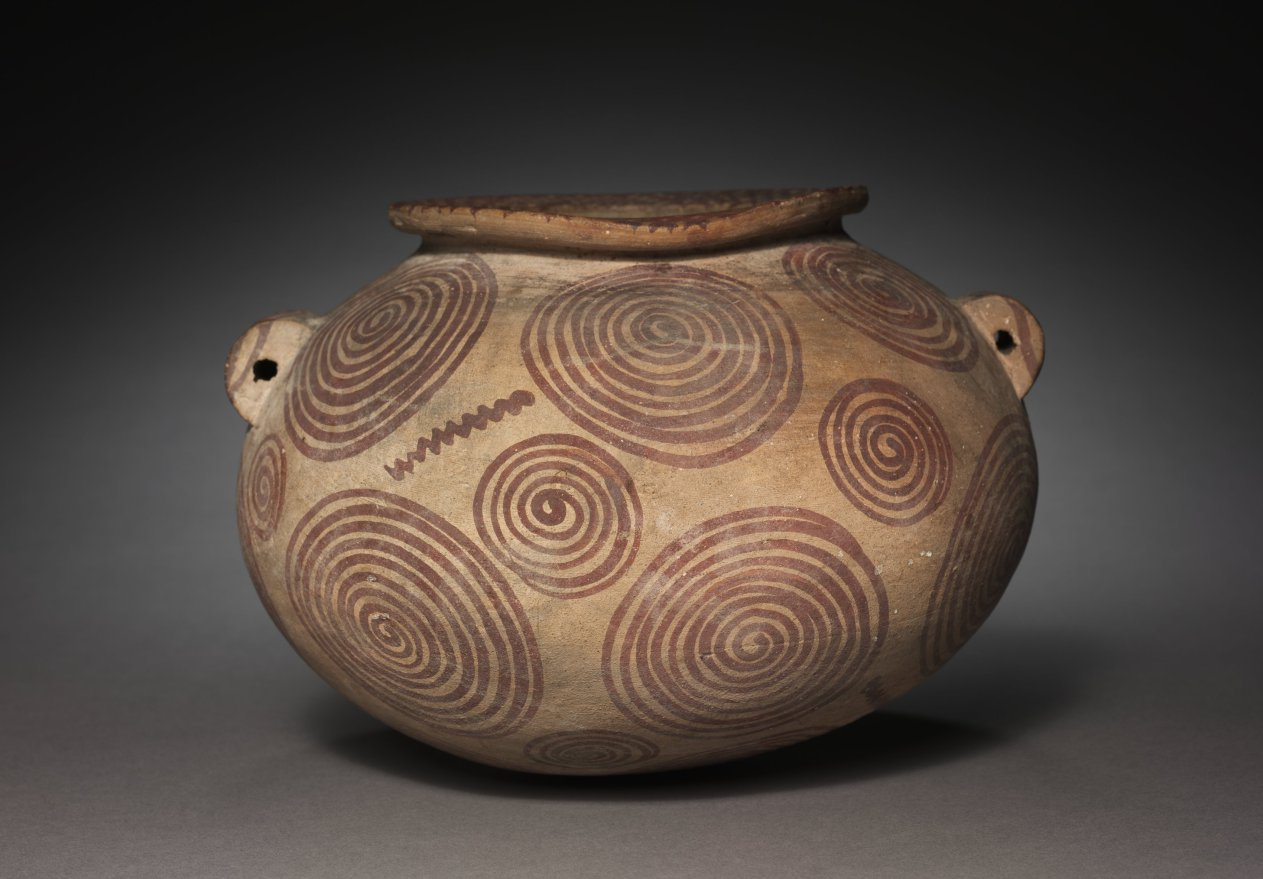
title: Squat Jar with Lug Handles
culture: Egypt, Predynastic (5000–2950 BCE), Naqada IIb (3650–3300 BCE)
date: 4000–3000 BCE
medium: marl clay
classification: Vessels